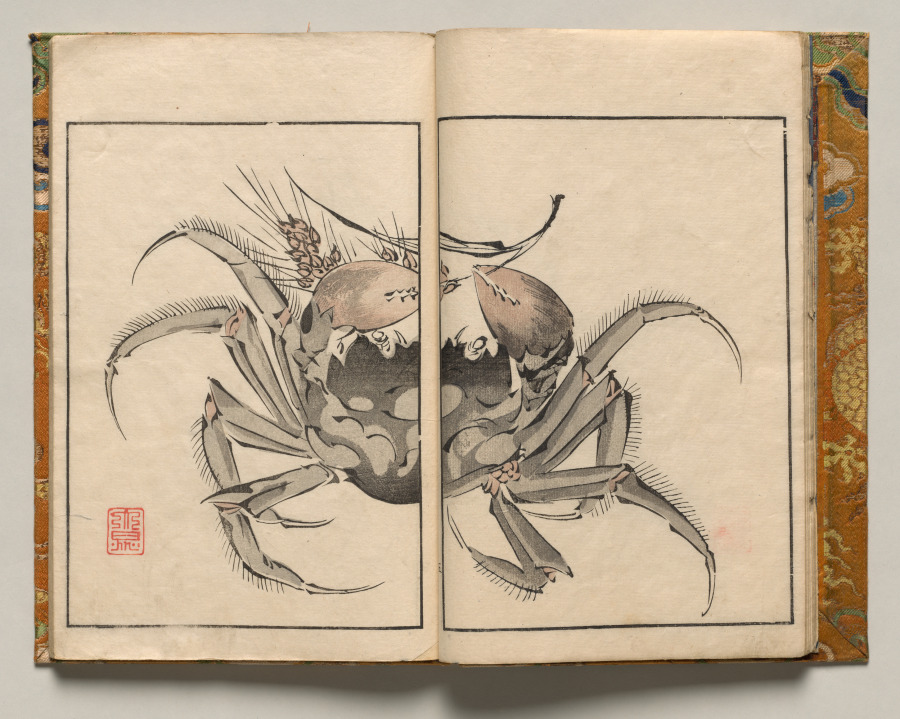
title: Crab with Sheaf of Grain, Design Five from Shazanrō Picture Book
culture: Japan, Edo period (1615–1868)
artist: Tani Bunchō (Japanese, 1763–1841)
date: 1816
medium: woodblock-printed book; ink and color on paper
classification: Bound Volume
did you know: Shazanrō was one of Tani Bunchō's style names.